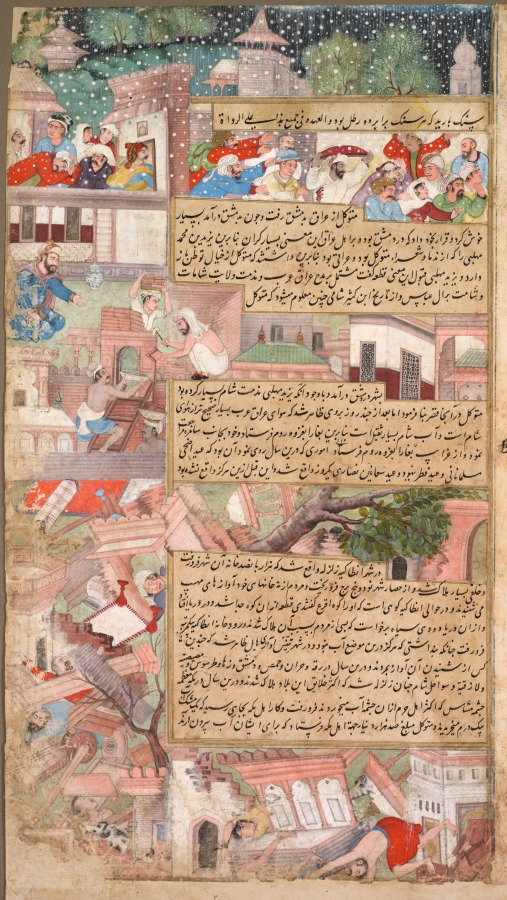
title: Page of disasters, from the Tarikh-i Alfi (History of the Thousand [Years])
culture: India, Mughal school, 16th century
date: c. 1595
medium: Gum tempera, ink, and gold on paper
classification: Painting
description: The 1,000th anniversary of Islam, according to the Hijri calendar followed by the Mughals and all Muslims, occurred during Akbar’s reign in 1592. He commemorated this milestone in many ways, including the commissioning of a new history of the Islamic world since the death of the Prophet Muhammad in 632. The episode discussed on this page took place during the 800s, when hailstorms beset Egypt and an earthquake hit Syria. The ruling caliph at the time was strongly prejudiced against Muslims who belonged to the Shi‘ite branch of Islam. Akbar seemed to be asking his artists to emphasize the natural disasters that took place, suggesting that they occurred as a result of the ruler’s intolerance.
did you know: Devastation after an earthquake includes a horse trapped under a fallen pavilion.